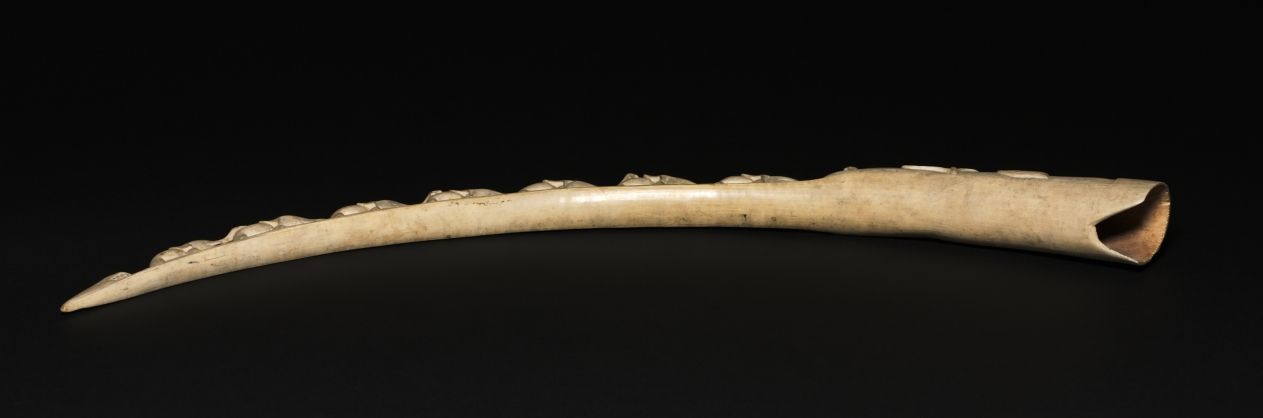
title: "Elephant Bridge" souvenir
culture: Central Africa, Democratic Republic of the Congo, 20th century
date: 1900s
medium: Elephant ivory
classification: Sculpture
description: This carving was made to appeal to Europeans and Americans in Central Africa, and did not draw from local aesthetics. It depicts an "elephant bridge," where the pachyderms are arranged with trunks and tails touching along the natural curve of an ivory tusk. Such compositions were often made in Japan, India, or China.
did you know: Skilled carvers in Central Africa could easily imitate other styles presented by patrons who commissioned works, such as this Congolese take on an Asian composition of elephants.